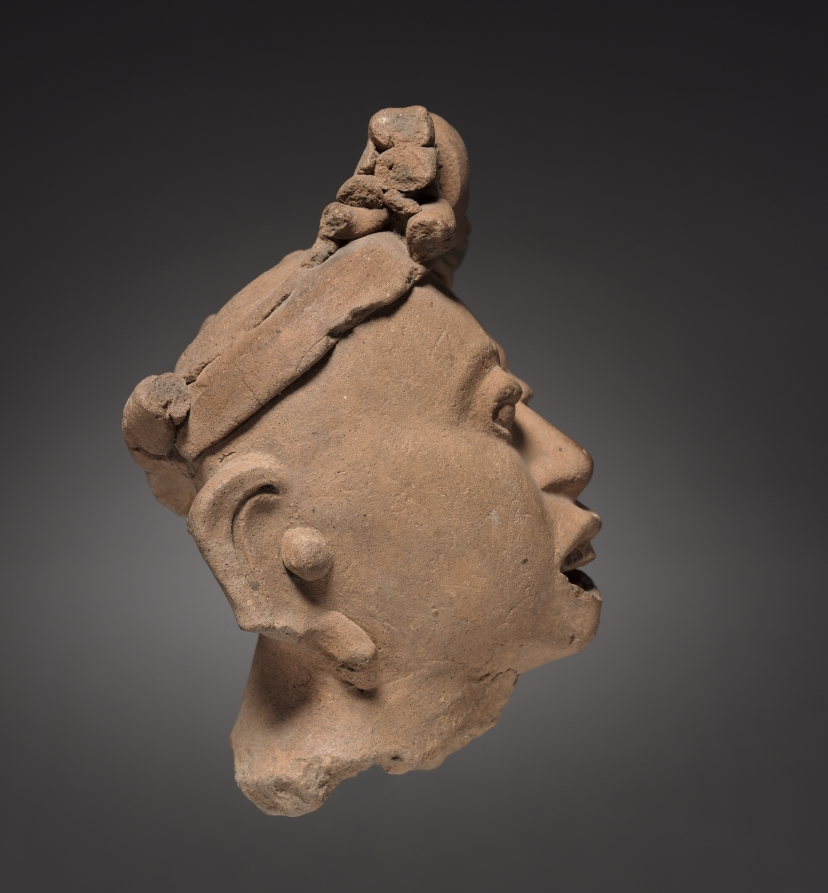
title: Head Fragment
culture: Mexico, Veracruz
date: 900–1200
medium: molded and modeled pottery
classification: Sculpture